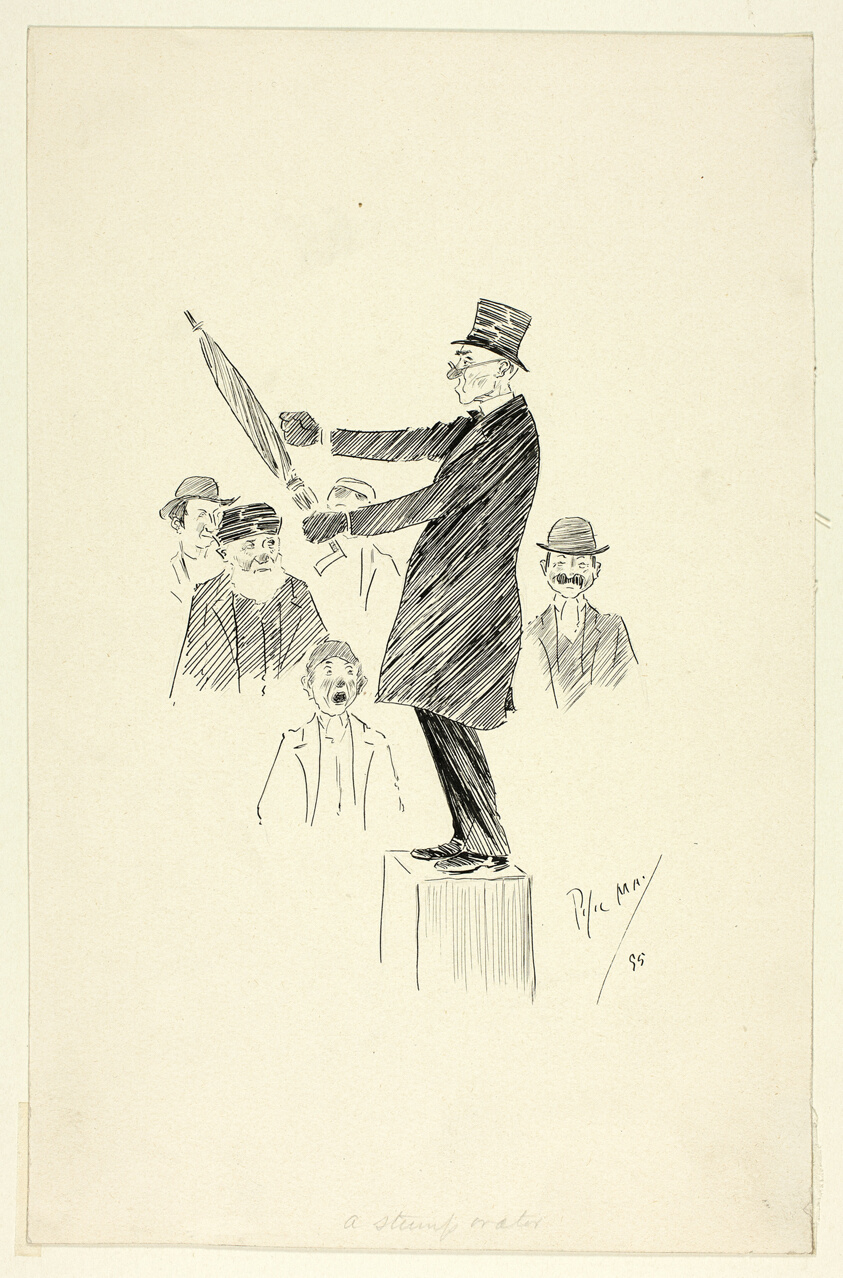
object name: Drawing and Watercolor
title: A Stump Orator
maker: Philipp William May; English, 1864-1903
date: 1899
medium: Pen and black ink over traces of graphite on buff wove card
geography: England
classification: pen and ink drawings; drawings (visual works); prints and drawing